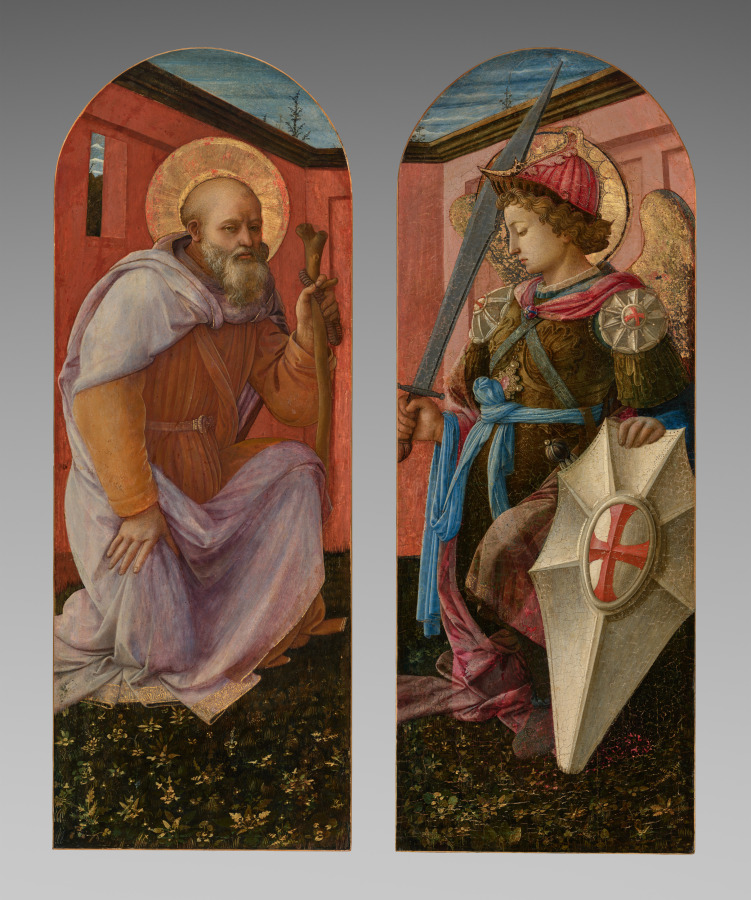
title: Pair of Panels from a Triptych: The Archangel Michael and St. Anthony Abbot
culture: Italy, Florence, 15th century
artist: Fra Filippo Lippi (Italian, c. 1406–1469)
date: 1458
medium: tempera on wood panel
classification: Painting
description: These panels depicting Saints Anthony the Abbot and Michael originally flanked a central scene of the Madonna and Child with Angels, now lost, to form a triptych. Giovanni di Cosimo de’ Medici of Florence commissioned the ensemble in 1457 as a diplomatic gift to Alfonso V of Aragon. Fra Filippo Lippi, a Carmelite friar and one of the great masters of early Renaissance Florence, depicted realistic, weighty figures in a three-dimensional space using a system of linear perspective, inspired partly by Masaccio’s Brancacci Chapel, and reflected in the background architecture. Saint Anthony the Abbot rejected all earthly possessions in pursuit of a contemplative life in the desert. He is generally regarded as the founder of monasticism and is depicted wearing a monk’s habit. Saint Michael’s sword, shield, and exquisitely bejeweled armor celebrate his role as heaven’s defender against evil.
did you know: Saint Michael's opulent appearance reflects the wealth and status of both the patron and the recipient of these paintings.